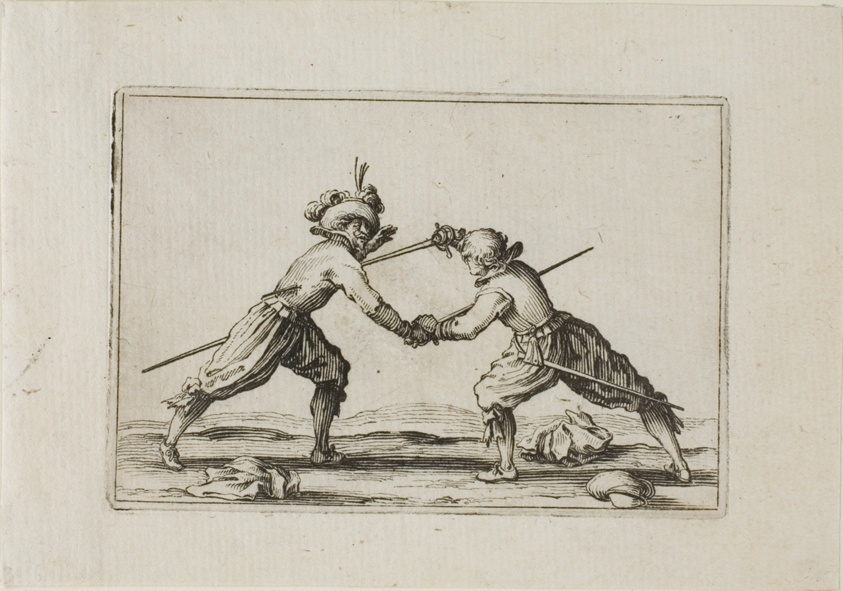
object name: Print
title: The Duel with Swords, from The Caprices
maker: Jacques Callot (French, 1592-1635)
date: c. 1622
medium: Etching on ivory laid paper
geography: France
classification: etching; print; prints and drawing